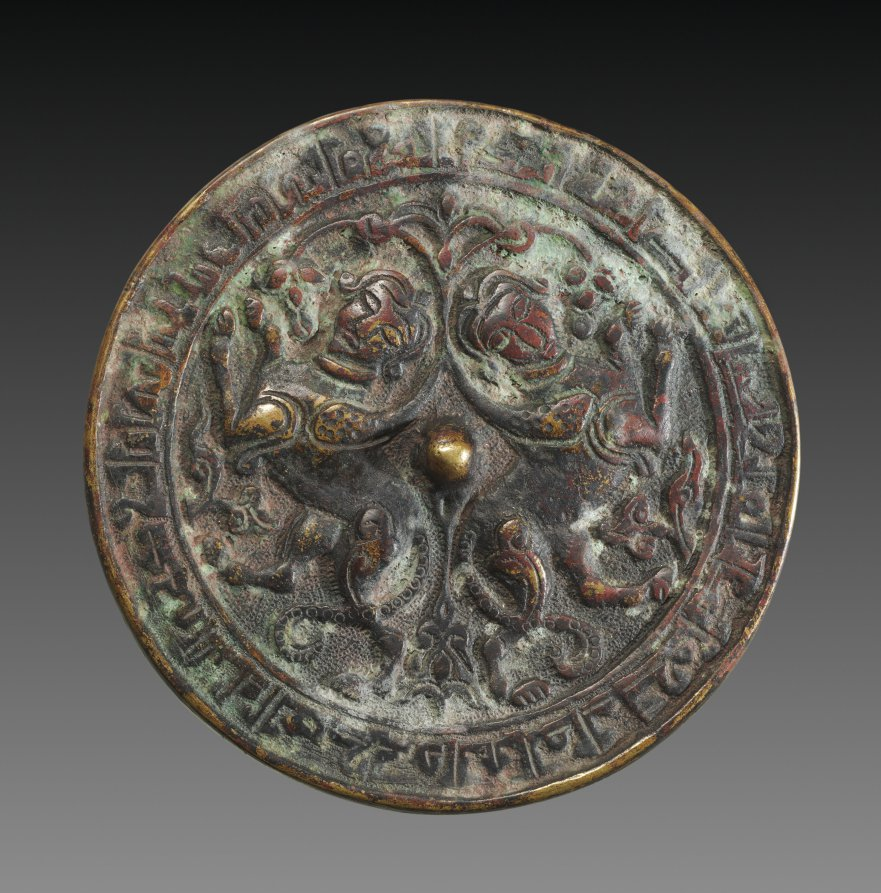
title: Mirror with Addorsed Sphinxes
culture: Eastern Anatolia or Northern Mesopotamia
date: 1200s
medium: Cast bronze with relief decoration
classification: Metalwork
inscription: Arabic inscription in degenerate floriated angular script around rim. Inscription is poorly written, but is identical to that on mirrors in Kuwait al-Sabah Collection (LNS102M) and Musée des Arts Decoratifs (14918). Translation (from M. Jenkins, "The al-Sabah Collection," 1983, p. 69): Glory and continence and good fortune and splendor and high position and praise and happiness and nobility and power and increase and potency and blessings to its owner forever.